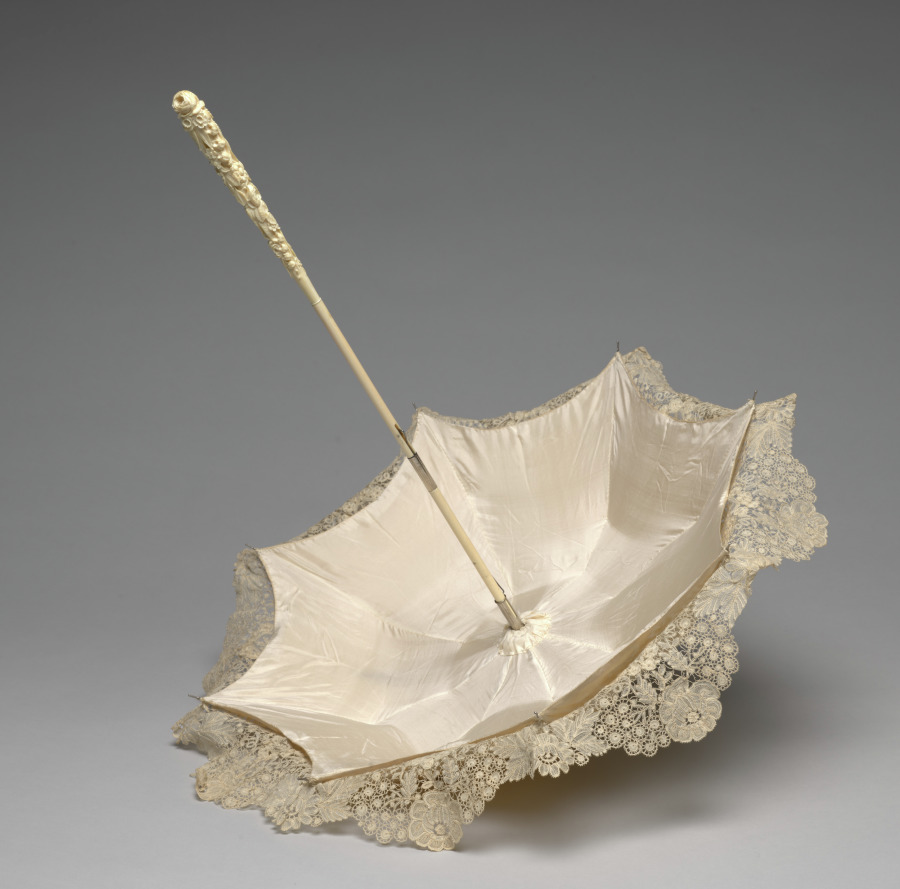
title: Lace Parasol with Ivory Handle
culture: Belgium, Brussels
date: 1880–99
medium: Needle lace and bobbin lace (Point Duchesse Lace) with carved ivory handle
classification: Lace